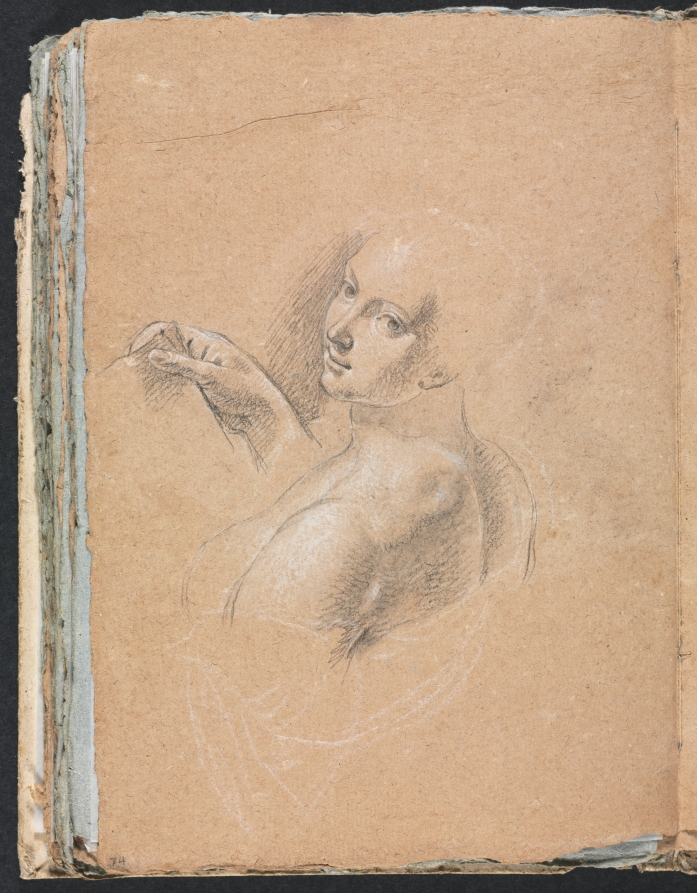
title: Verona Sketchbook: Female nude looking over left shoulder (page 74)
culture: Italy, 18th century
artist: Francesco Lorenzi (Italian, 1723–1787)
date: 1760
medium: black chalk with white heightening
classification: Bound Volume